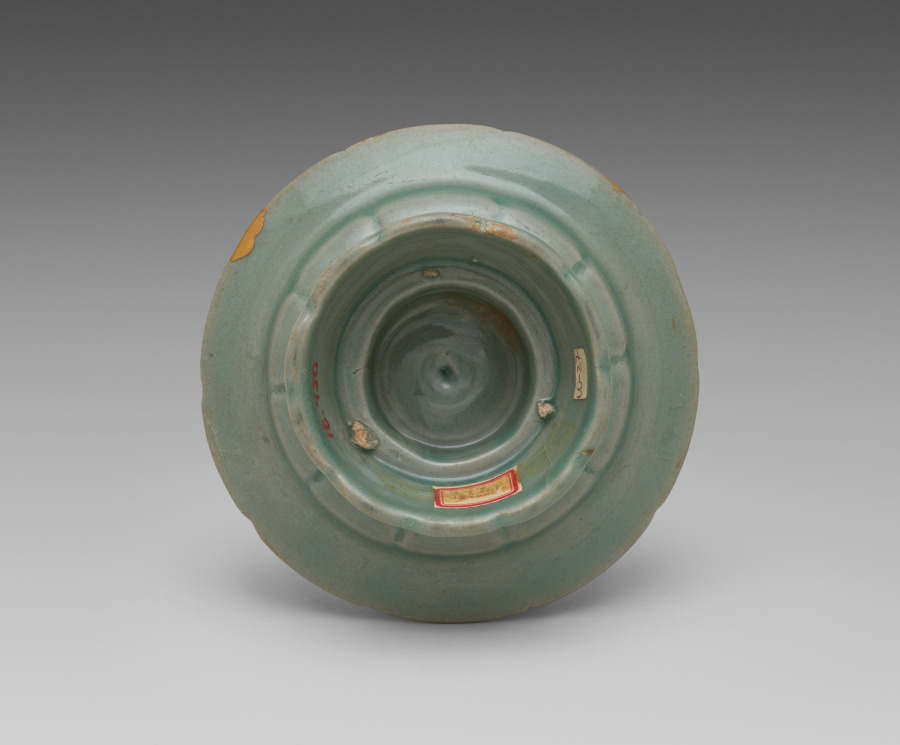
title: Floral-shaped Cup Stand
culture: Korea, Goryeo dynasty (918–1392)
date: 1100s-1200s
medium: celadon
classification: Ceramic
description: As early as the seventh century, the practice of drinking tea became an important part of elite culture in Korea. In enjoying teas, elites commissioned a variety of types of utensils and vessels including this delicate-looking cup stand, not only to make their tea-drinking experience more exciting, but also to show their refined taste.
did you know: According to a historical record, the cultivation of tea in Korea was initiated with green tea plant seeds from China by royal order in 828.